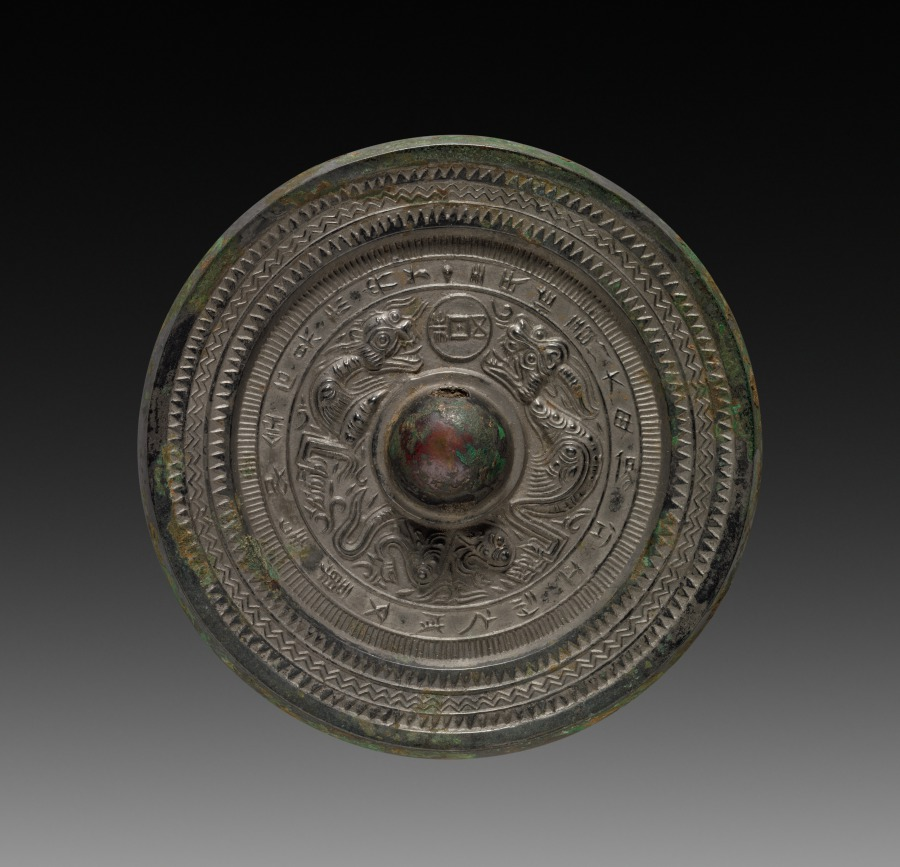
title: Mirror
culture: China, Eastern Han dynasty (25–220 CE)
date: 25–220 CE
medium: bronze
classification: Metalwork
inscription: Mr. Wang has made this mirror; it is true and without blemish. Its decoration is engraved with skilled craftsmanship. May your longevity be like metal and stone; may you have joy without end.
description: Two of the same animals of the Four Directions seen in the "TLV" mirror are cast in high relief and twisted in confrontation: the Dragon of the East with long snout, pointed horn, and scaly backbone meets the Tiger of the West with feline head and striped neck. An amphibious creature of unknown symbolism swims between their tails. The circle between their heads duplicates the form of a copper coin, minted during the Han dynasty, that was strung through its square perforation. The encircling inscription reads: "Mr. Wang has made this mirror; it is true and without blemish. Its decoration is engraved with skilled craftsmanship. May your longevity be like metal and stone; may you have joy without end."